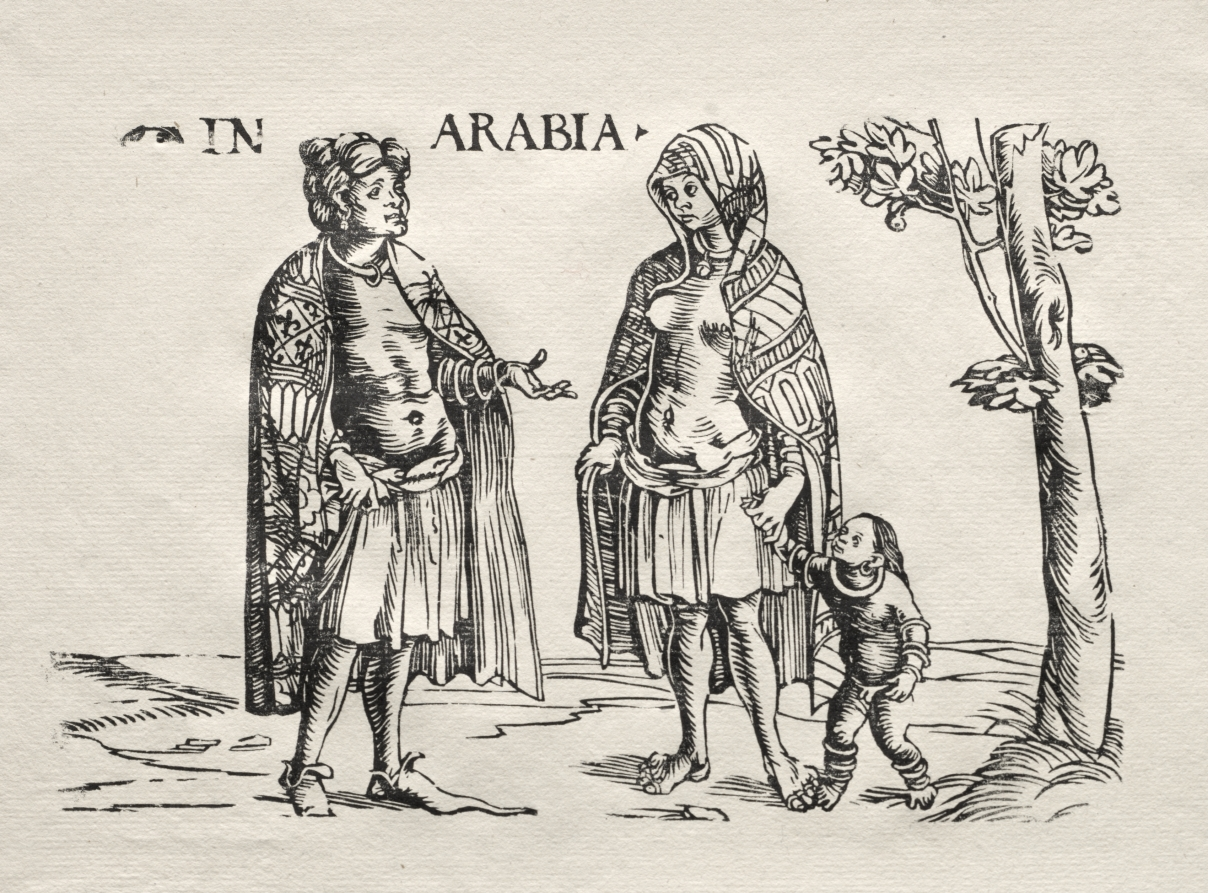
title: Natives of Arabia and the Indies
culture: Germany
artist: Hans Burgkmair (German, 1473–1531)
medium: woodcut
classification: Print